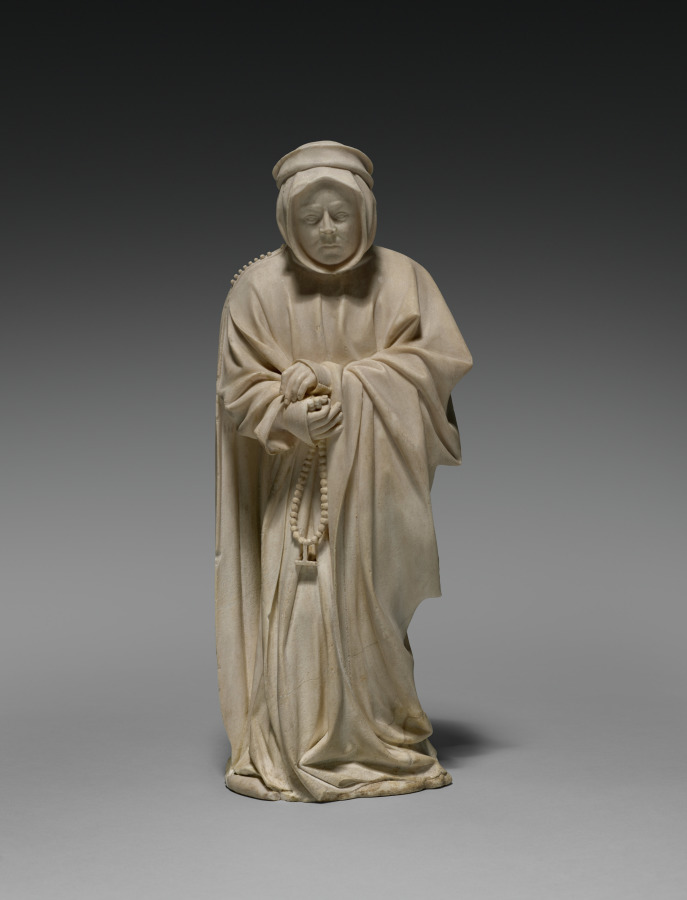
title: Mourner from the Tomb of Philip the Bold, Duke of Burgundy (1364–1404)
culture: Netherlands, active Dijon, 15th century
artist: Claus de Werve (Netherlandish, 1380–1439)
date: 1404–1410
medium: vizille alabaster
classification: Sculpture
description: This figure comes from the tomb of Duke Philip the Bold from the church of Champmol near Dijon (Burgundy, France). Philip, who founded the monastery and designated it as his burial place, hired the best artists, many of whom came from the Netherlands. While the commission was given in 1381, the work was not completed until 1410, six years after the duke’s death. This mourner is unusual for the time because it is not carved as a static low relief on the pedestal of the tomb but interacts with the viewers and their fellow procession members. The lifelike quality of the figure is due in large part to the alabaster. Its softness allowed artists to carve details into the material, and the transparent, milky white stone could also be polished to a high gloss.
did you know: During his life, Duke Philip founded the monastery of Chartreuse de Champmol to serve as a final resting place for himself and his family.